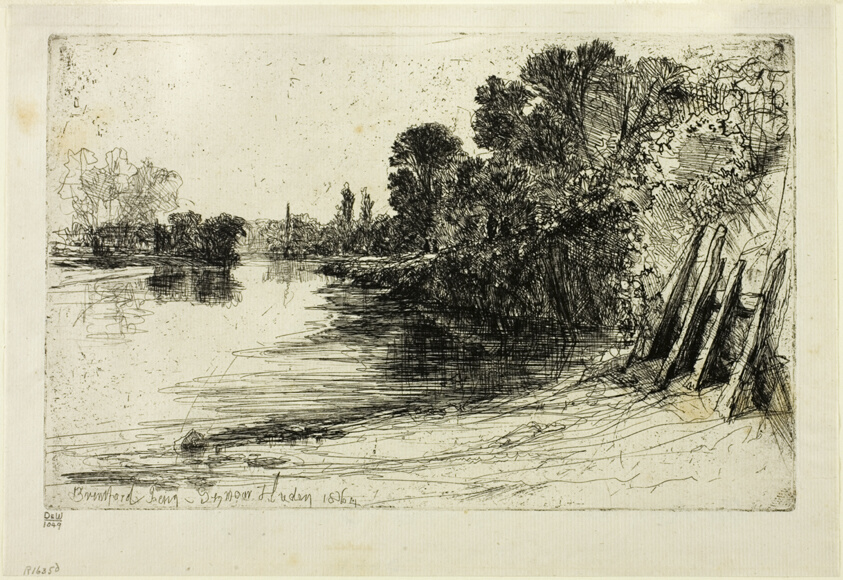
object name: Print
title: Brentford Ferry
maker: Francis Seymour Haden (English, 1818-1910)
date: 1864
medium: Etching with drypoint on cream laid paper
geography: England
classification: etching; print; prints and drawing